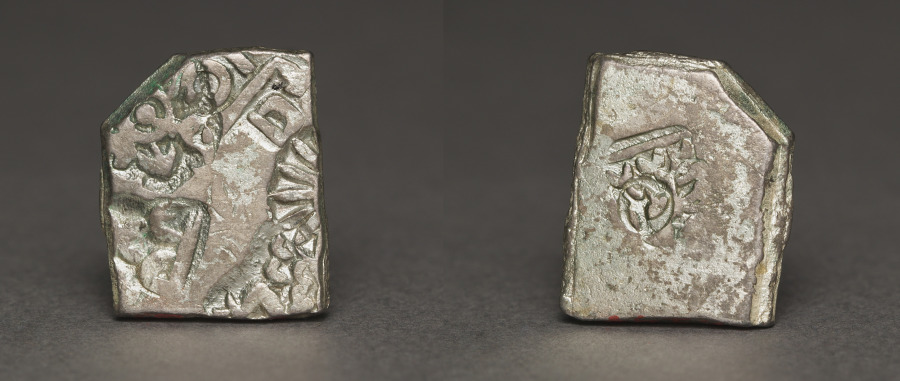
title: Punch-Marked Coin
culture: India, Rajasthan, Maurya period (322–185 BCE)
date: 400–300 BCE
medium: silver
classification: Coins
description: After Alexander of Macedon succeeded in conquering Egypt and Persia in 331 BC, his ambition to rule the known world led him further east across Bactria in Afghanistan, through the Hindu Kush mountain pass, and into India. There he succeeded in defeating all the local kings of the region until his men, on the brink of mutiny, insisted that they return to Greece. Alexander left governors in charge of his territories, and after his death in 323 BC, his governors became independent kings, establishing Hellenistic cities and a Greek cultural base in the region, which lasted for almost 200 years. Native Indian coinage was marked with symbols associated with the place where they were issued.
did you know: Early Indian coins were cut in irregular shapes and punched with a wide range of marks. The deep punches would prove that the coin was pure silver all the way through.